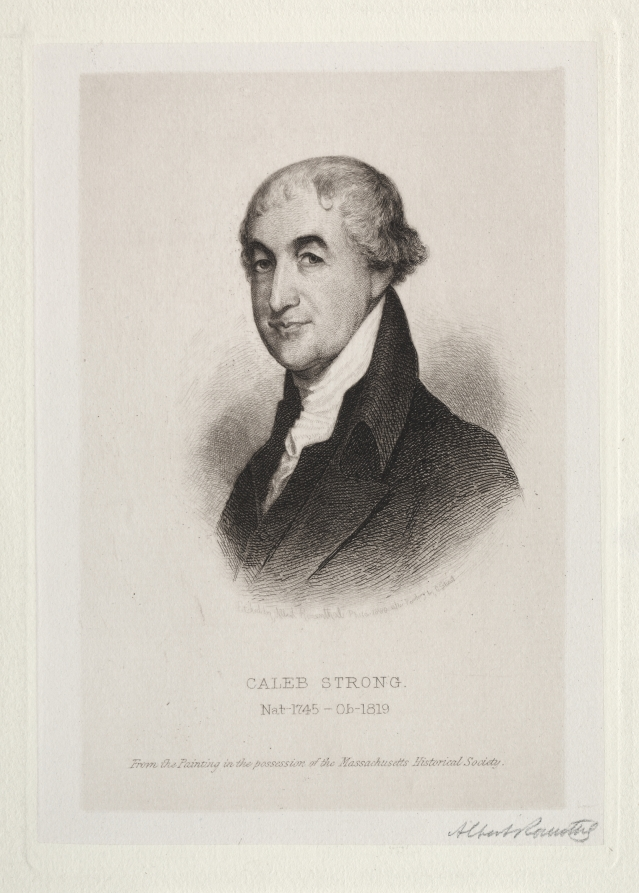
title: Caleb Strong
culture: America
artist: Albert Rosenthal (American, 1863–1939)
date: 1888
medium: etching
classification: Print